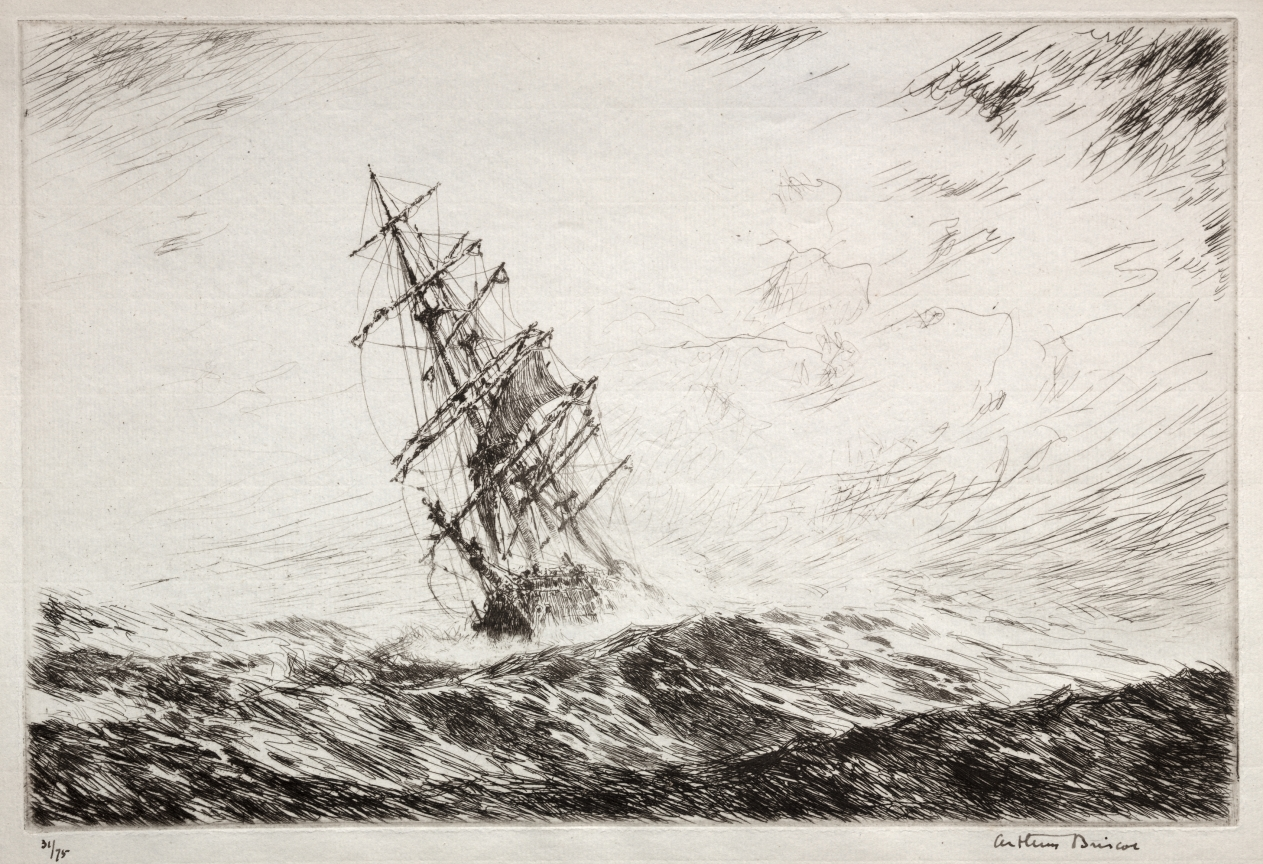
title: Hove To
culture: England, 20th century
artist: Arthur John Trevor Briscoe (British, 1873–1943)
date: 1929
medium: etching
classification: Print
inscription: Lower margin, in brown ink: 31/75 Arthur Briscoe